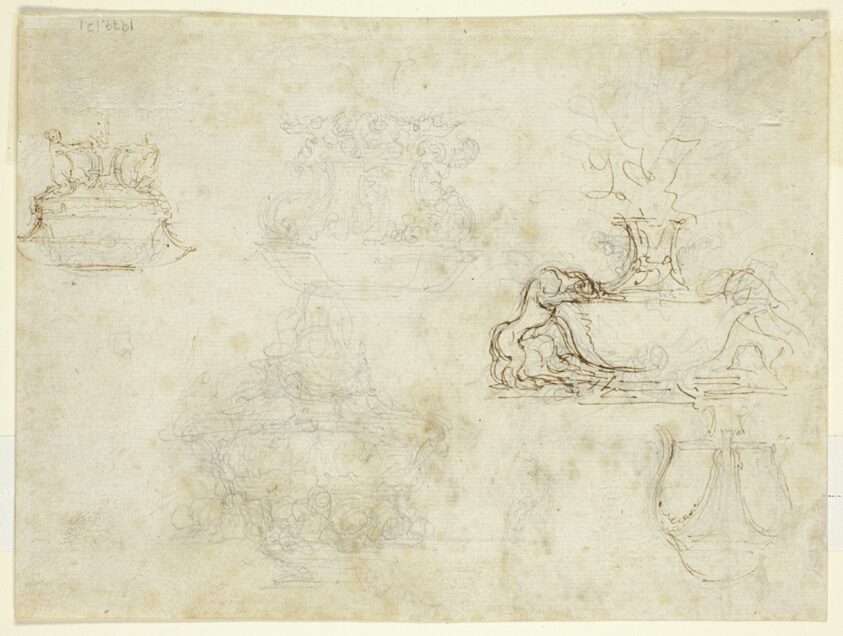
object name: Drawing and Watercolor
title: Study for Satyr Family Walking (recto); Sketches of Five Decorative Vessels (verso)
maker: Stefano della Bella (Italian, 1610-1664)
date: c. 1657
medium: Pen and brown ink and graphite (recto and verso) on ivory laid paper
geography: Italy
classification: pen and ink drawings; drawings (visual works); prints and drawing